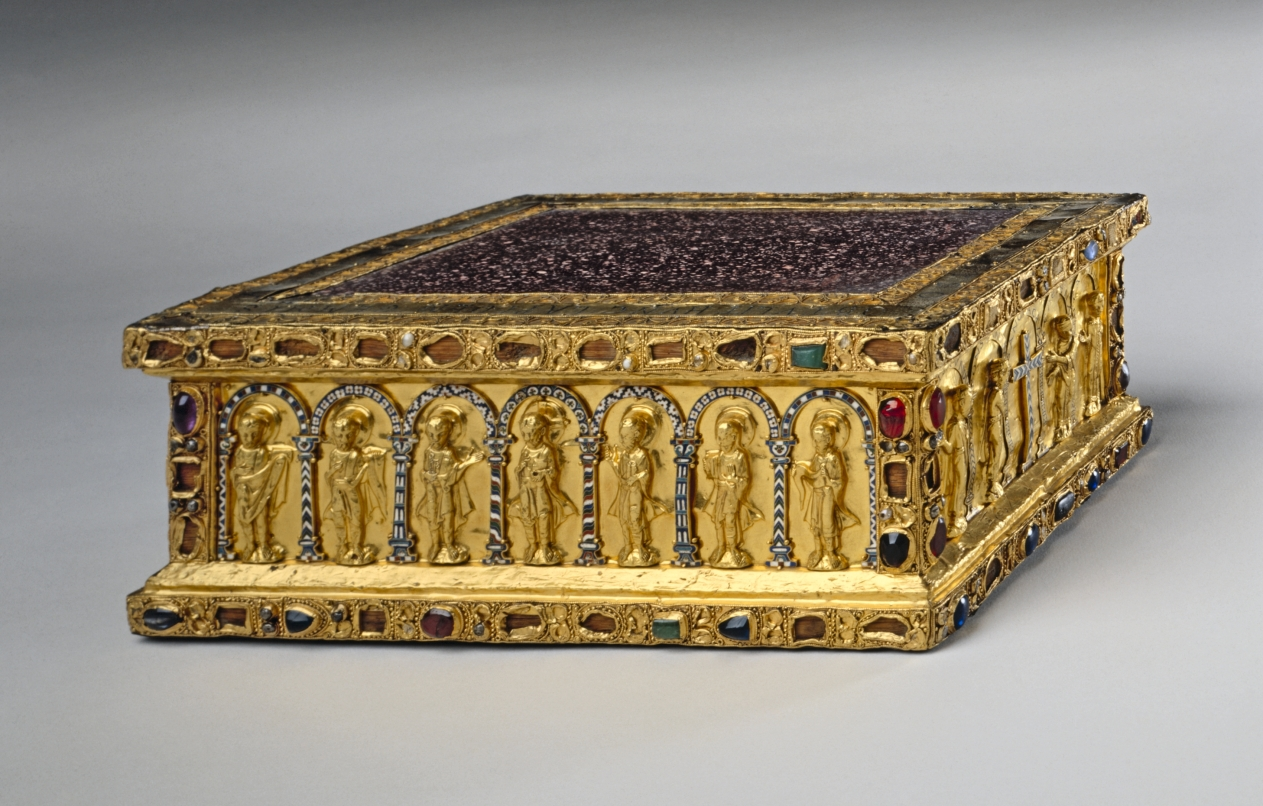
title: Portable Altar of Countess Gertrude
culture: Germany, Lower Saxony?, Romanesque period, 11th century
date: shortly after 1038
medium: gold, cloisonné enamel, porphyry, gems, pearls, niello, wood core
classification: Metalwork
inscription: translation of inscription: In order to live happily in Him, Gertrude presented to Christ this stone glistening with precious stones.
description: Commissioned by Countess Gertrude of Brunswick, this portable altar is one of the Guelph Treasure’s earliest and most sumptuous objects. The choice of white-speckled porphyry as the altar stone signals Gertrude’s worldly aspirations; an imperial color since classical antiquity, porphyry was only used by the imperial family. Historical figures of royal and imperial rank are depicted with Christ, the Virgin, apostles, and archangels along the altar’s sides, stressing the countess’s political ambitions and claim of imperial lineage for her own dynasty. The Latin inscription surrounding the altar stone reads, "Gertrude offers to Christ, to live joyfully in him, this stone that glistens with gems and gold."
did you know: On the bottom of this altar is a trap door that opened to reveal small relics of saints wrapped in silk.